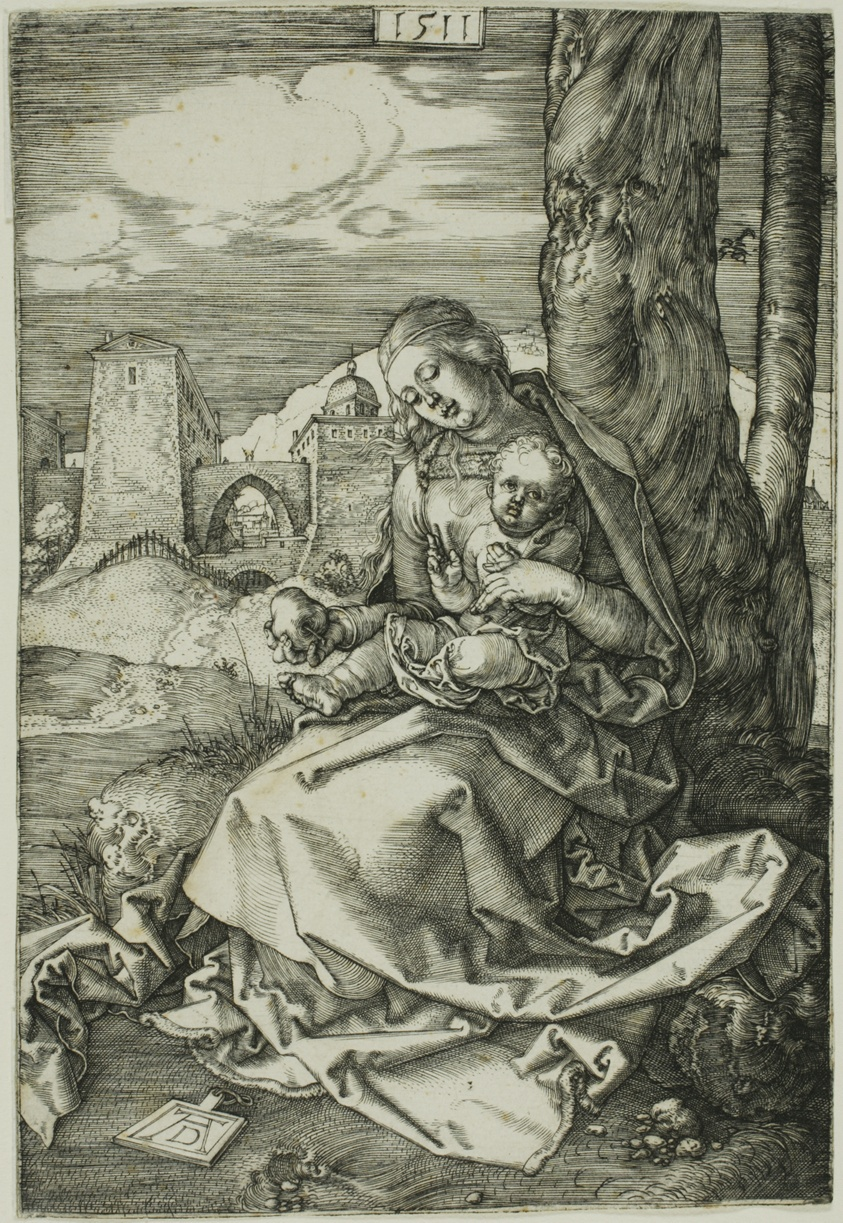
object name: Print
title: Madonna with the Pear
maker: Albrecht Dürer (German, 1471-1528)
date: 1511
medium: Engraving in black on ivory laid paper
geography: Germany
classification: engraving; print; prints and drawing; paper